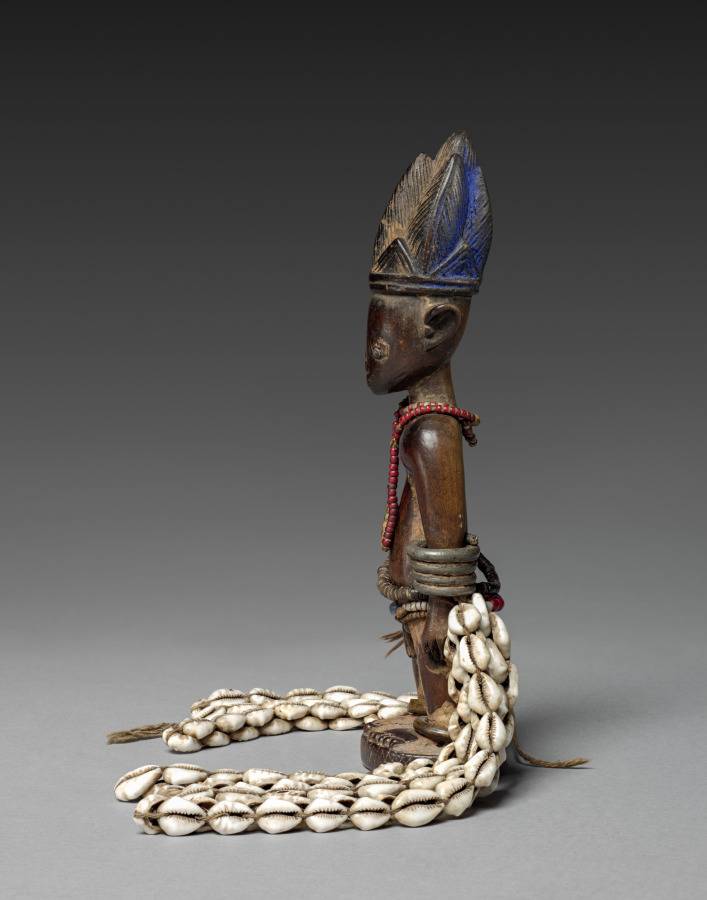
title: Twin Figure (Ère Ìbejì)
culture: Africa, West Africa, Nigeria, Yorùbá-style maker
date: late 1800s–early 1900s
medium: Wood, copper alloy, iron alloy, lead, glass beads, cowrie shells, twine, and pigment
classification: Sculpture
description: Such a figure is carved when a twin dies in infancy and serves as a memorial to the surviving sibling. These twin figures are always carved to look like adult individuals with idealized physical features. Various body adornments suggest the care parents devote to their children, while the erosion of facial features indicates the symbolic washing and feeding of the figure as a means to connect the soul of the deceased to that of the living twin.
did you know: This figure commemorates a twin that has died in infancy.